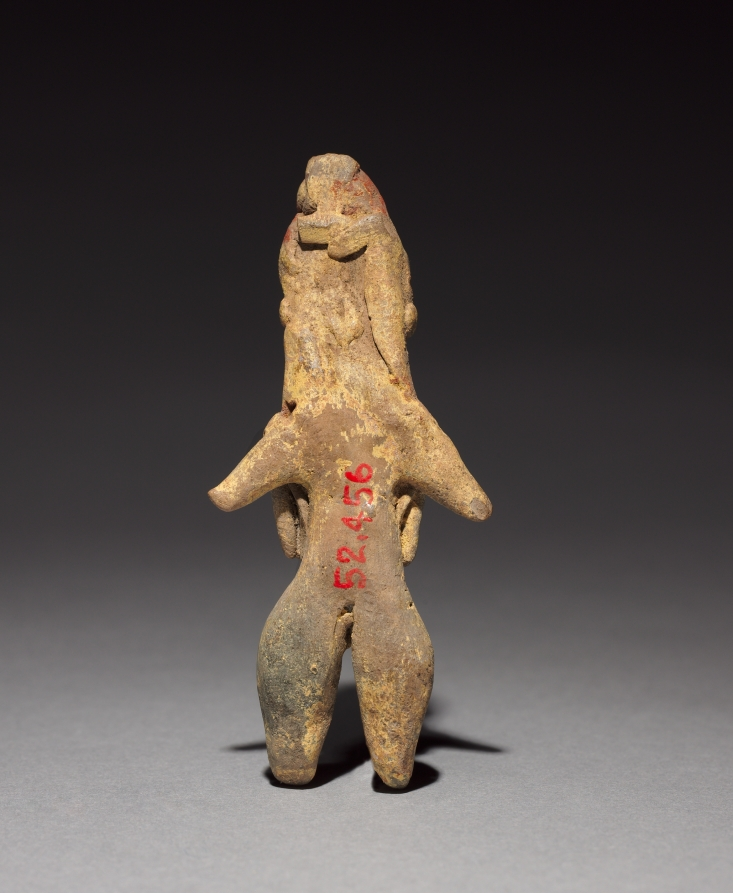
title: Archaic Figurine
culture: Mesoamerica, Central Mexico, Tlatilco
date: c. 1200–900 BCE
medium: earthenware with pigment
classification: Ceramic